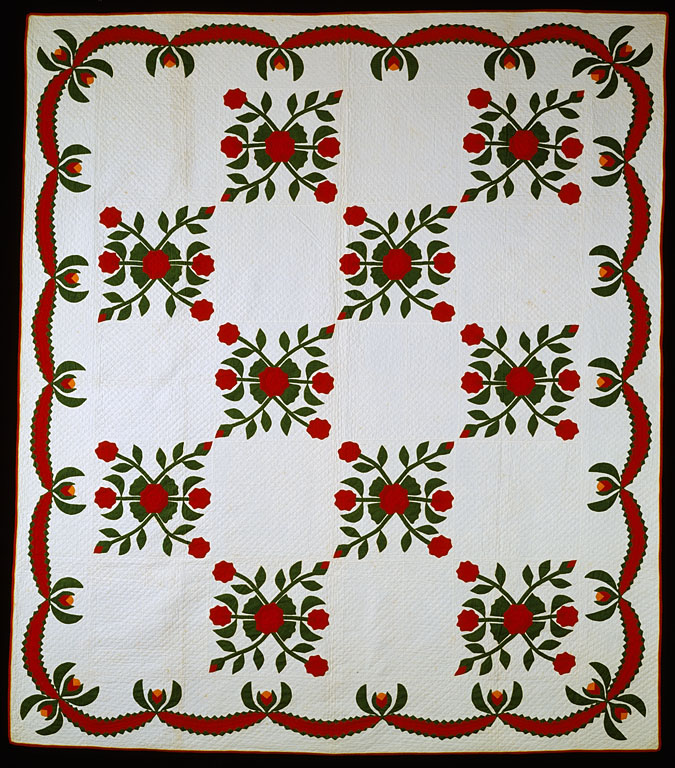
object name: Textile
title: Bedcover (Peony Quilt)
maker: United States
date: c. 1840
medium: appliqué, quilting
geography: United States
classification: textile; needlework - quilt